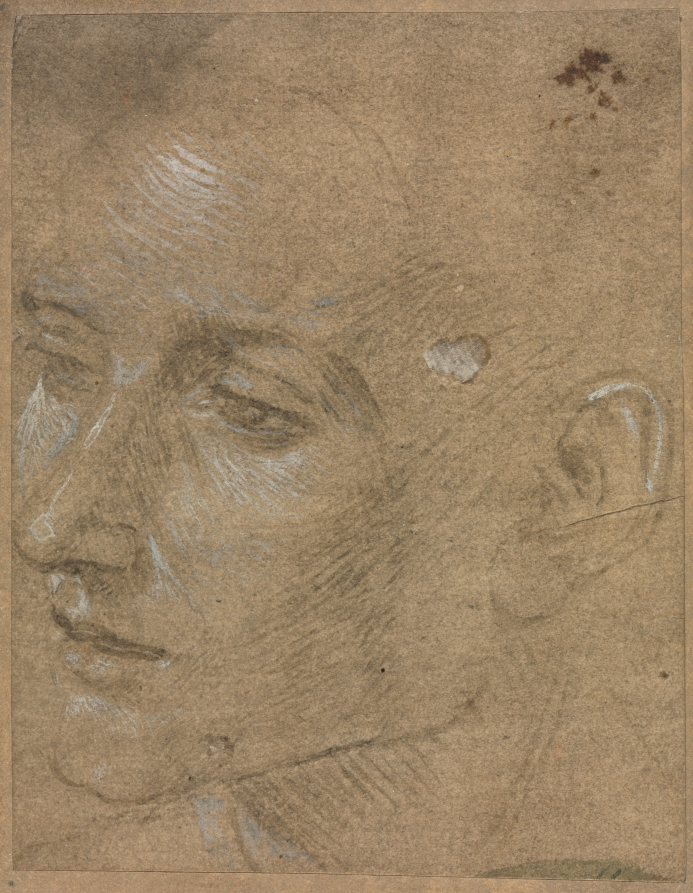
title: Head of a Young Man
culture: Italy, 15th century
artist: Filippino Lippi (Italian, c. 1457–1504)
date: second half 1400s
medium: point of brush and brown wash and brush and brown wash heightened with lead white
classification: Drawing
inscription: FRAGMENT OF OLD MOUNT (now removed): [illegible] / [illegible] ; in blue ink: Fillipino Lippi [underlined] / Silbers tip. Zeich . ; in graphite: 242 [underlined]